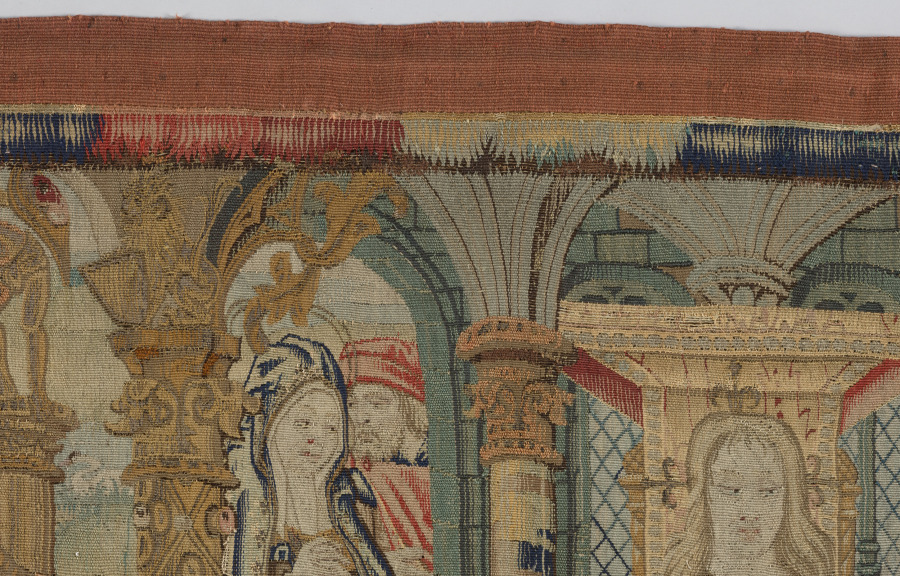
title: Altar Frontal: Scenes from the Childhood of Christ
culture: France and South Netherlands, 1500s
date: c. 1500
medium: Wool, silk, gold thread; tapestry weave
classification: Tapestry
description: Pictorial tapestries were symbols of wealth and more highly prized than paintings. Small tapestries with Christian imagery were frequently commissioned to embellish the fronts of altars. This example displays the Massacre of the Innocents, the Flight into Egypt, and Christ among the Doctors. Tapestry weave is ideal for creating narrative scenes. The technique can be compared to painting, as each colored weft (horizontal thread) is interlaced with warps (vertical thread) where needed for the pattern. As expensive investments, tapestries have the advantage of being portable and easily stored and displayed.